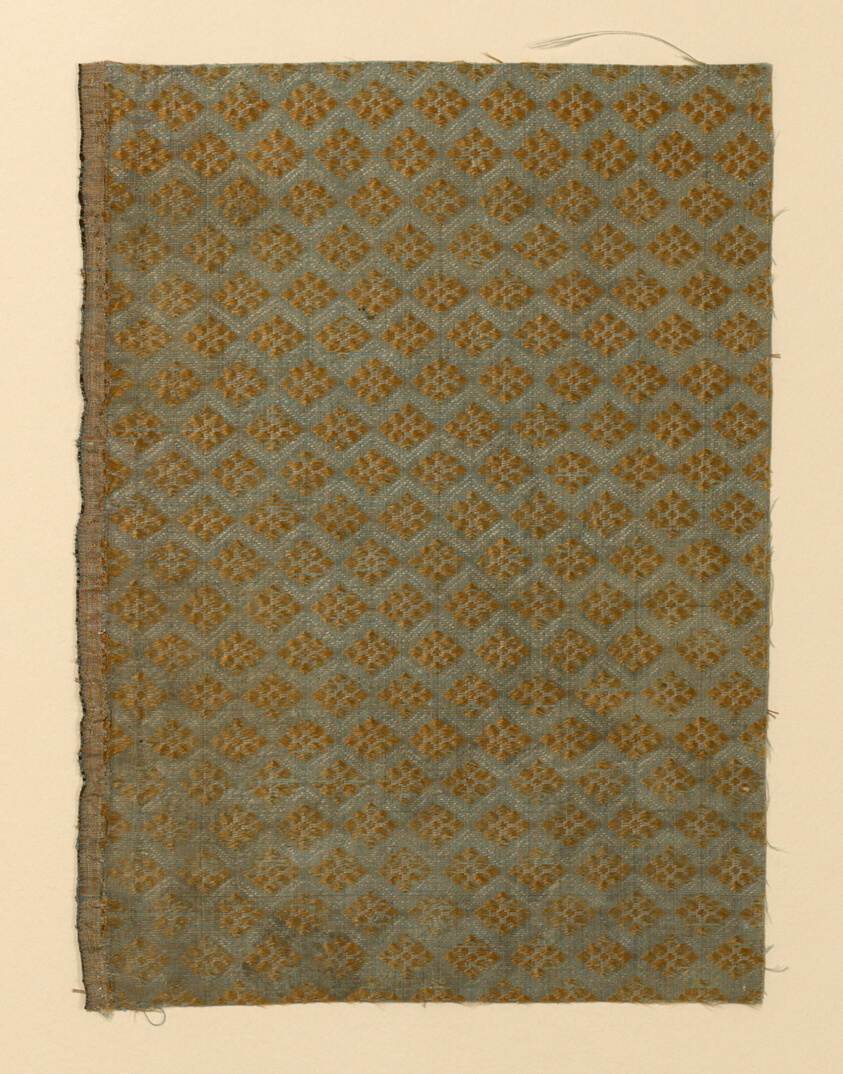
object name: Textile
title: Fragment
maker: Italy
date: c. 1650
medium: Silk, plain compound cloth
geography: Italy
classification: textile; weaving